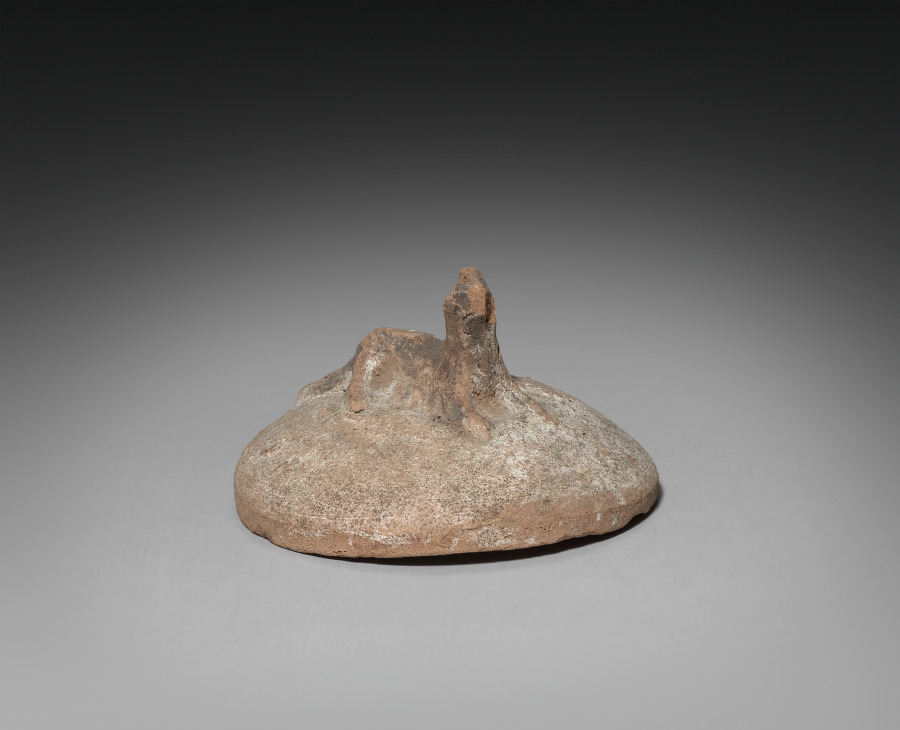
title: Shawabty Jar with Lid (lid)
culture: Egypt, New Kingdom (1540–1069 BCE), Dynasties 19–20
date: 1295–1069 BCE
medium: Nile silt ware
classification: Funerary Equipment